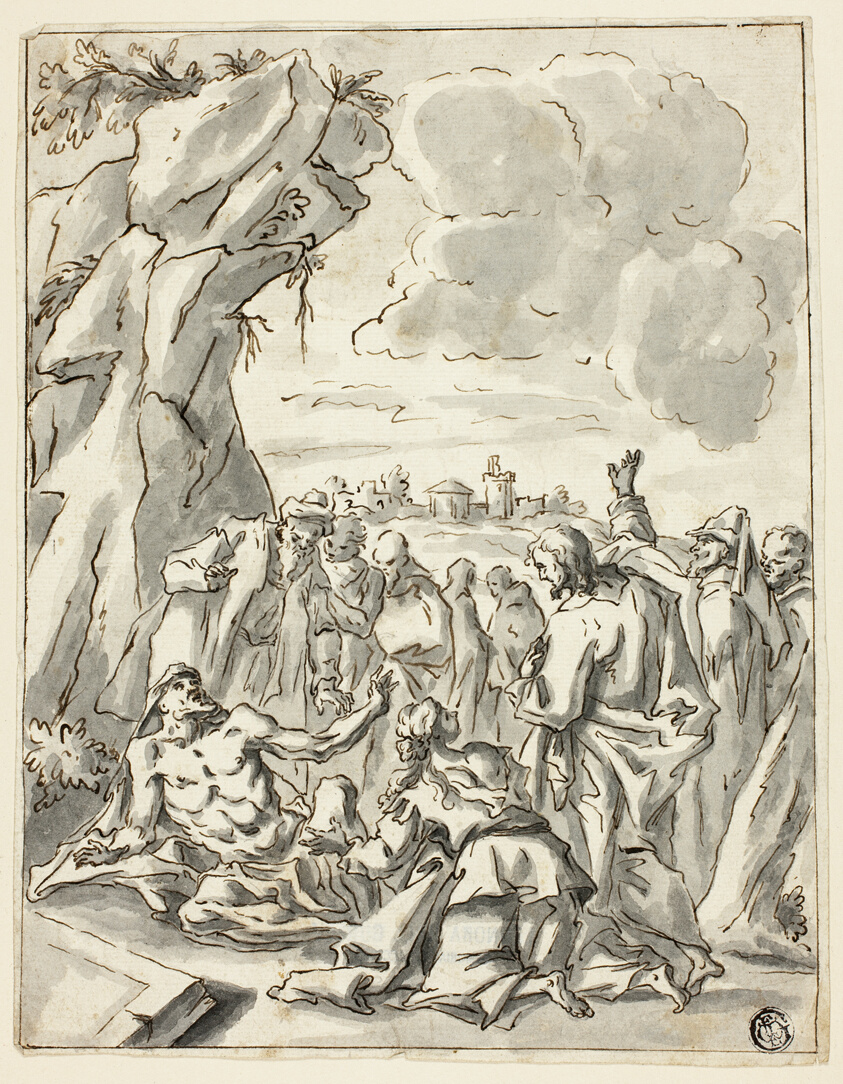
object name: Drawing and Watercolor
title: The Raising of Lazarus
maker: Unknown Artist; German, 18th century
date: 18th century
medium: Pen and brown ink, with brush and gray wash, over touches of graphite, on ivory laid paper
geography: Germany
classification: pen and ink drawings; drawings (visual works); prints and drawing